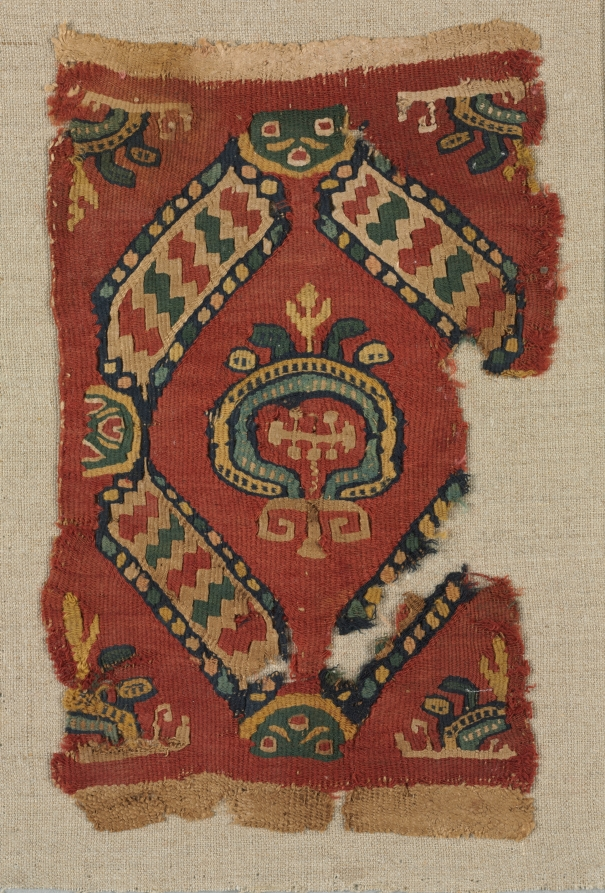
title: Fragmentary Ornament from a Tunic with Lozenges and Medallions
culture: Egypt, Abbasid period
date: mid 700s - mid 800s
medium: tapestry weave; wool and linen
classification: Textile